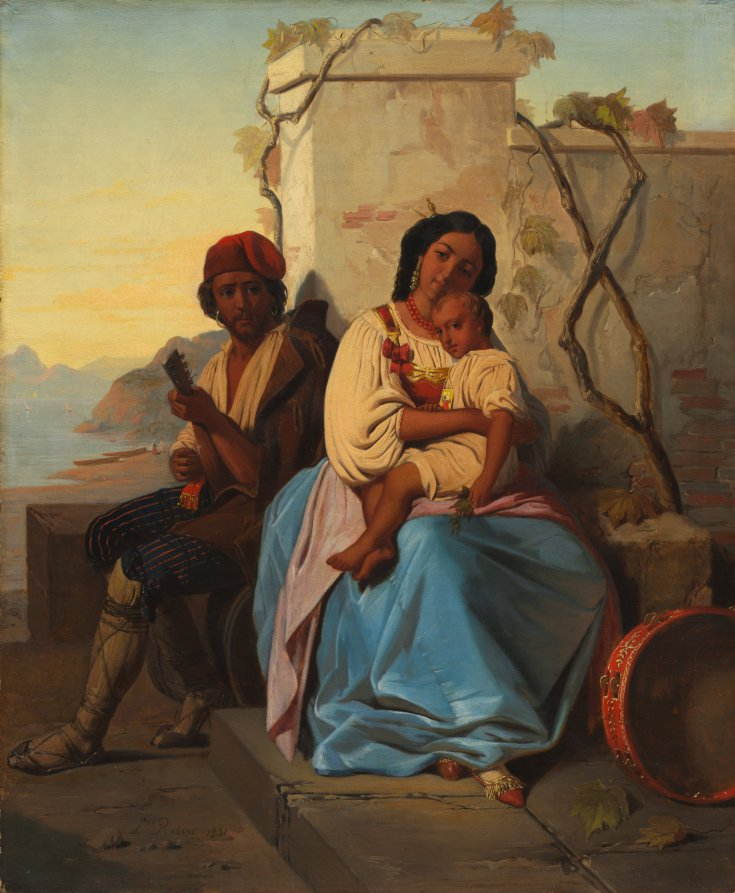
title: Italian Scene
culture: Switzerland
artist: imitator of Léopold Robert (Swiss, 1794–1835)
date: not dated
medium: oil on fabric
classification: Painting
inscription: Signed and dated lower left: Lld Robert 1831